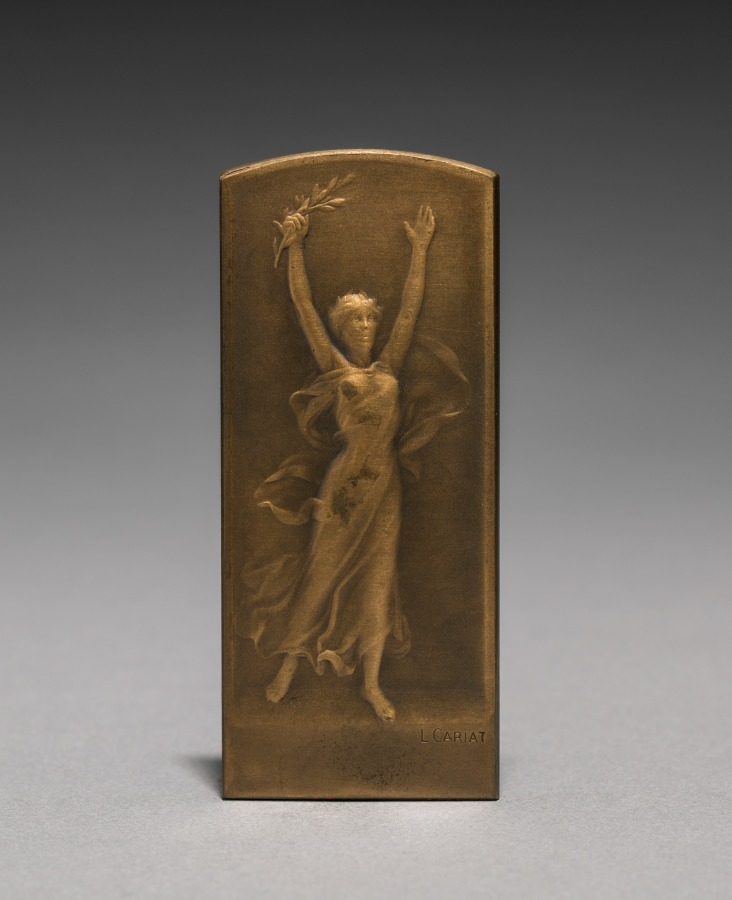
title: Medal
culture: France, 19th century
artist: Lucien Julien Henri Cariat (French)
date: c. 1900–1925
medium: bronze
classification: Metalwork